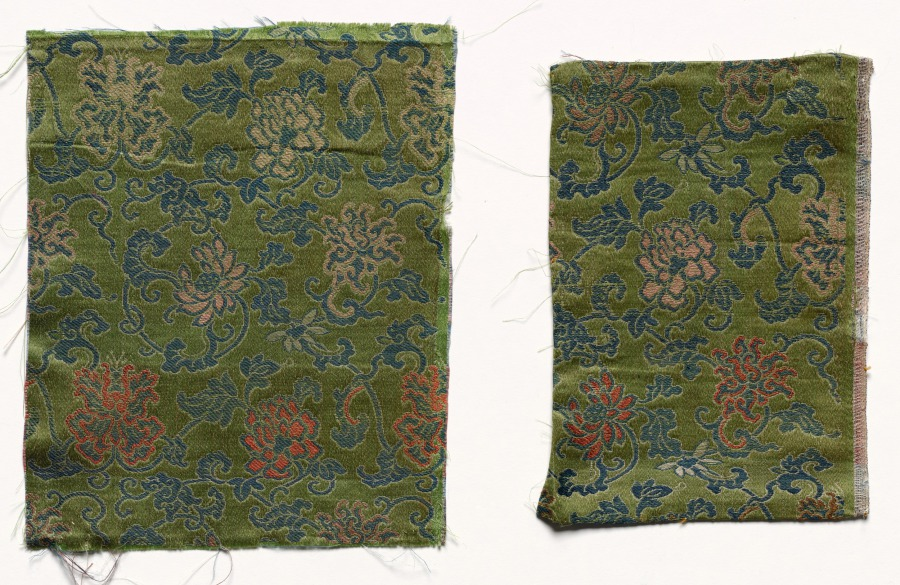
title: Fragment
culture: China, 18th century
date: 1700s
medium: silk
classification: Textile